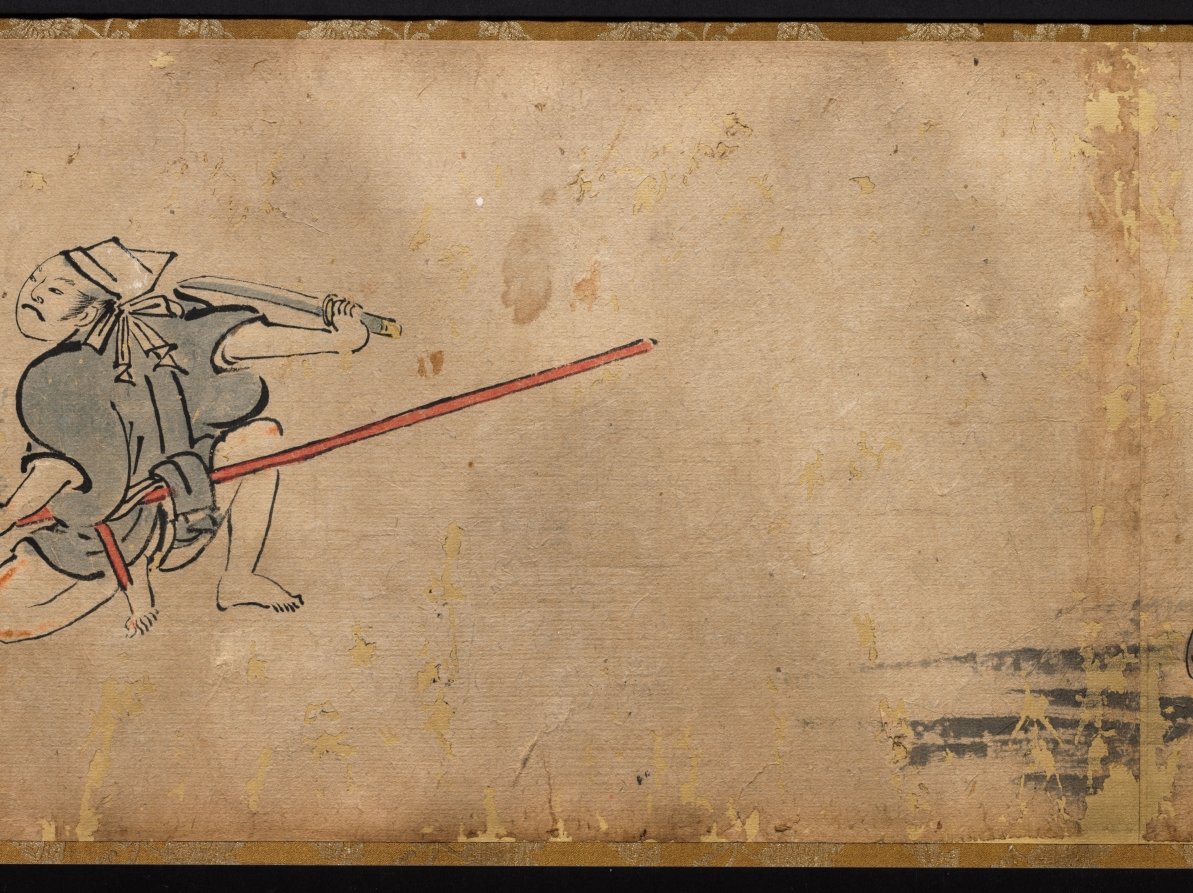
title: The Illustrated Tale of Oishi Hyōroku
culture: Japan, Edo period (1615–1868)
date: 1700s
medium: handscroll; ink and color on paper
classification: Painting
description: This incomplete handscroll illustrates part of the story of Oishi Hyoroku, a young man tasked with battling fox apparitions who were creating problems in his town. In other extant versions of the scroll, the story is set in the fall of 1624 in Kagoshima in southern Japan. Throughout the story, Hyoroku is tricked and terrified by the foxes that shift their shapes into a variety of monstrous phantoms. After repeated humiliations, he eventually captures two of the foxes. In this version, colloquial texts that function like text blurbs in comics appear throughout the scroll, but the main text is missing.